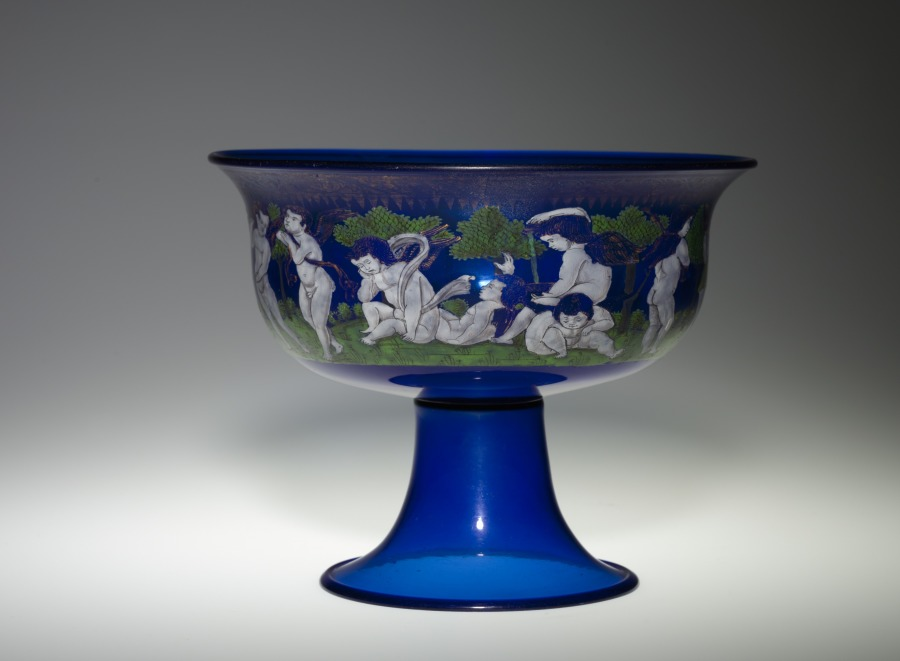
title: Tazza with a Frieze of Putti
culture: Italy, Venice (Murano), 19th century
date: 1800s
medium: enameled blue glass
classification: Glass